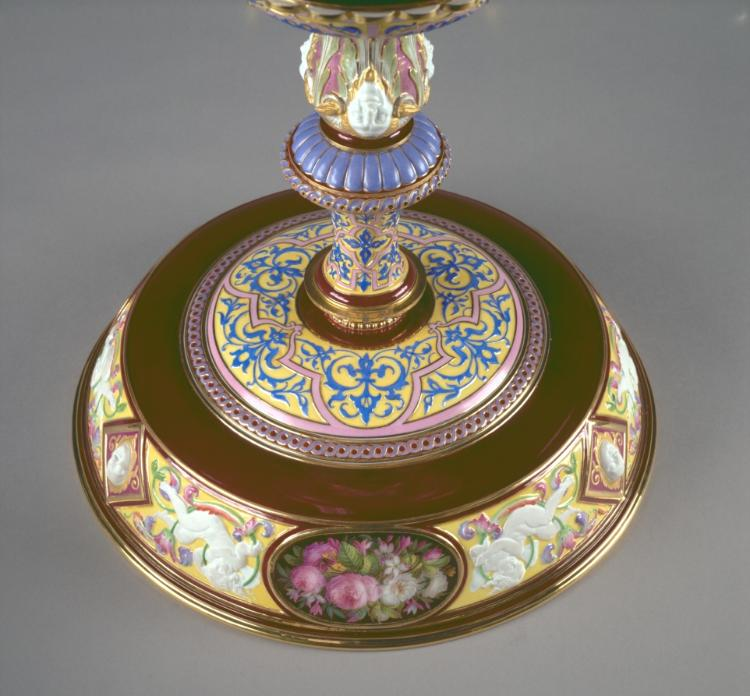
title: Standing Cup and Cover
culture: France, Sèvres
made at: Sèvres Porcelain Factory (French, est. 1756)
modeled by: Hyacinthe-Jean Regnier (French, 1803–1870)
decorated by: Francois-Hubert Barbin (French, 1786-)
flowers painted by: Jacques-Nicolas Sinsson (French)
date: 1844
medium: porcelain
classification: Ceramic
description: The official French porcelain factory at Sèvres has always been one of Europe's most important ceramic manufacturers, famous for its decorative pieces as well as more utilitarian wares. This vase in the Renaissance style, its design inspired by 16th-century French examples, is clearly in the tradition of elaborately conceived and decorated pieces intended for use by the French court or as presentation pieces by its monarchs. The latter was the fate of this Covered Cup, acquired in 1846 by Queen Marie-Amélie d'Orleans, the wife of Louis-Philippe, king during the July Monarchy (1830-48). Soon thereafter the vase was presented to a now unknown person. It is one of four pieces of this design made at the Sèvres factory, and the only one known today to have survived.